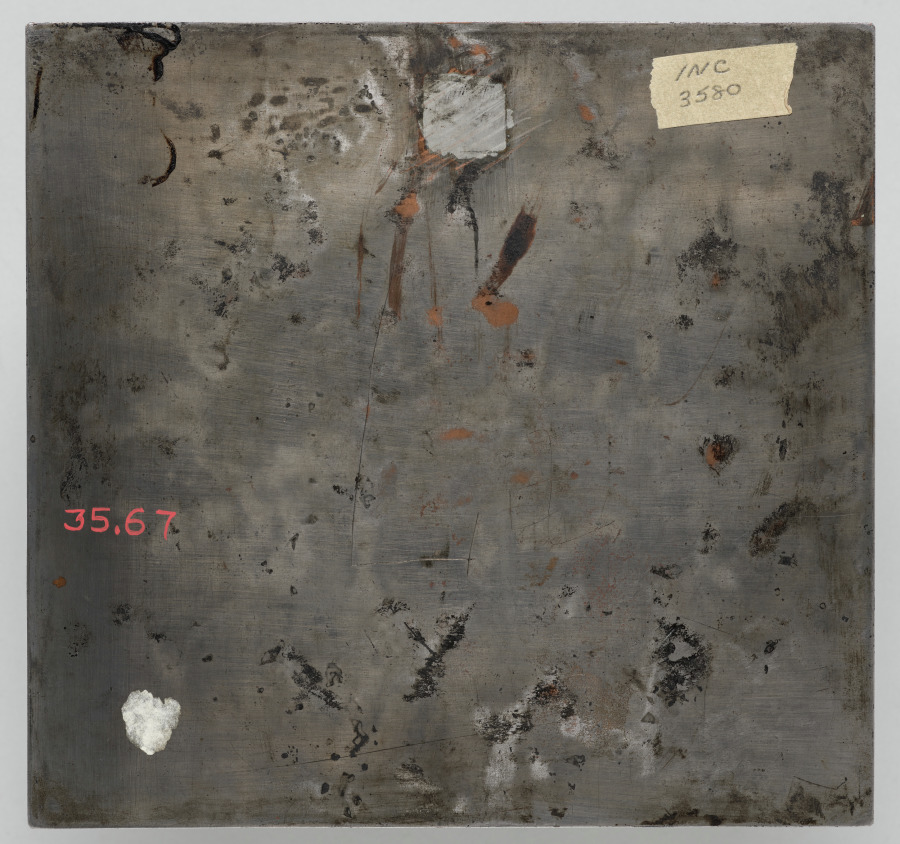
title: La Promenade sur le Port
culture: France, 20th century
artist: Jean-Émile Laboureur (French, 1877–1943)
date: 1935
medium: cancelled copper plate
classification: Plate